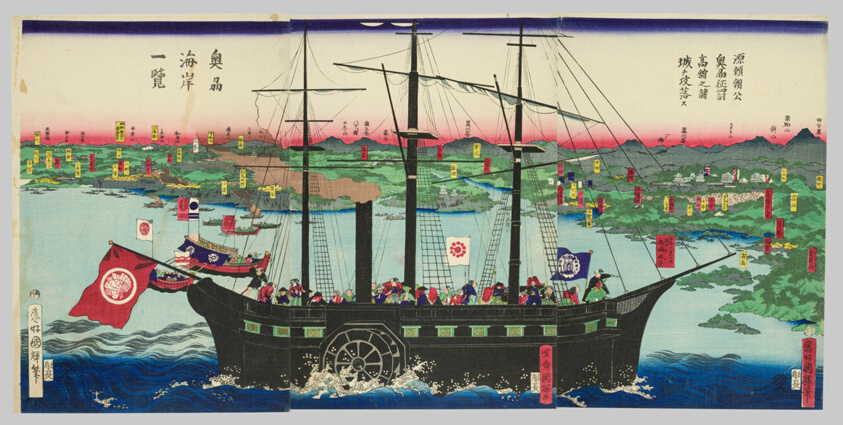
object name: Print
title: Lord Minamoto Yoritomo Captures Takadate Castle in His Conquest of Mutsu Province (Minamoto Yoritomo ko Oshu seibatsu Takadachi no shojo o koraku su), and View of the Coast of Mutsu Province (Oshu kaigan ichiran)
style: Japanese (culture or style)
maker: Utagawa Kuniteru II (Kunitsuna II) (Japanese, 1830–1874)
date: 1868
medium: Color woodblock print; left sheet of oban triptych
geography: Japan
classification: woodblock print; print; asian art